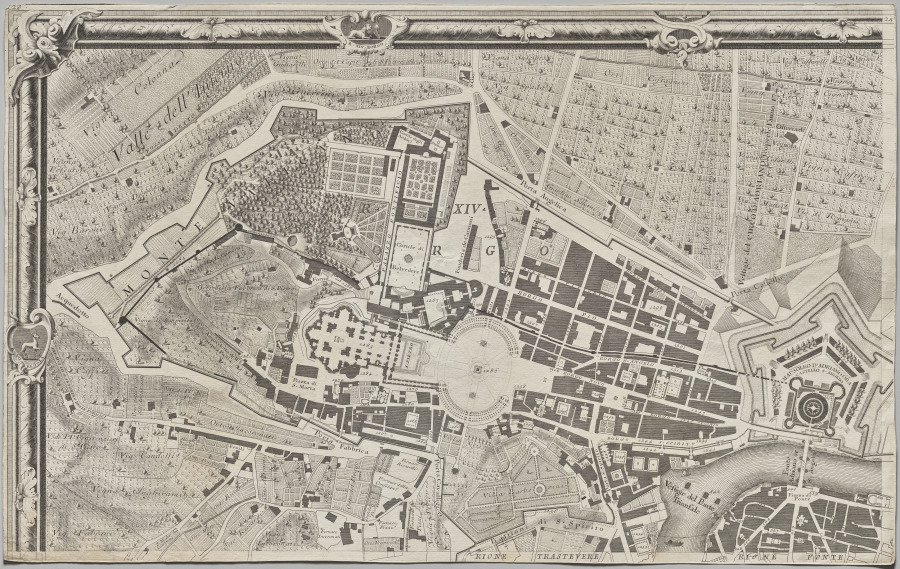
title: Nuova pianta di Roma data in luce da Giambattista Nolli l’anno MDCCXLVII, known as La Pianta Grande di Roma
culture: Italy, 18th century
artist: Giovanni Battista Nolli (Italian, 1701–1756)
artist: Carlo Nolli (Italian, 1690–1790)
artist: Rocco Pozzi (Italian, 1701–1774)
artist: Pietro Campana de Soriano (Italian, 1725–c. 1779)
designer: Stefano Pozzi (Italian, 1699–1768)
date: 1748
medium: etching and engraving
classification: Print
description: The monumental Pianta Grande di Roma, or Large Plan of Rome, which measures about 5 x 7 feet when its twelve plates are assembled, is a landmark in both cartography and printmaking. The map is considered the first scientific rendering of Rome, establishing new standards of accuracy and thoroughness when it was published in 1748. Devised by the Lombard architect and surveyor Giovanni Battista Nolli (Italian, 1701-56), the creation of the map required over ten years of surveying the city carried out by Nolli and a team of assistants with the help of new measuring devices. In Nolli’s “ichnographic” (also called “ground”) plan, architectural features and the urban infrastructure are reduced to a single horizontal slice, a minutely detailed footprint that conveys dimensions, proportions, and orientations to scale with the utmost clarity.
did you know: To make this map, Pope Clement XII granted the mapmaker permission to measure courtyards and other interior, inaccessible spaces in monastic communities, even those in nuns’ convents, which was controversial at the time.